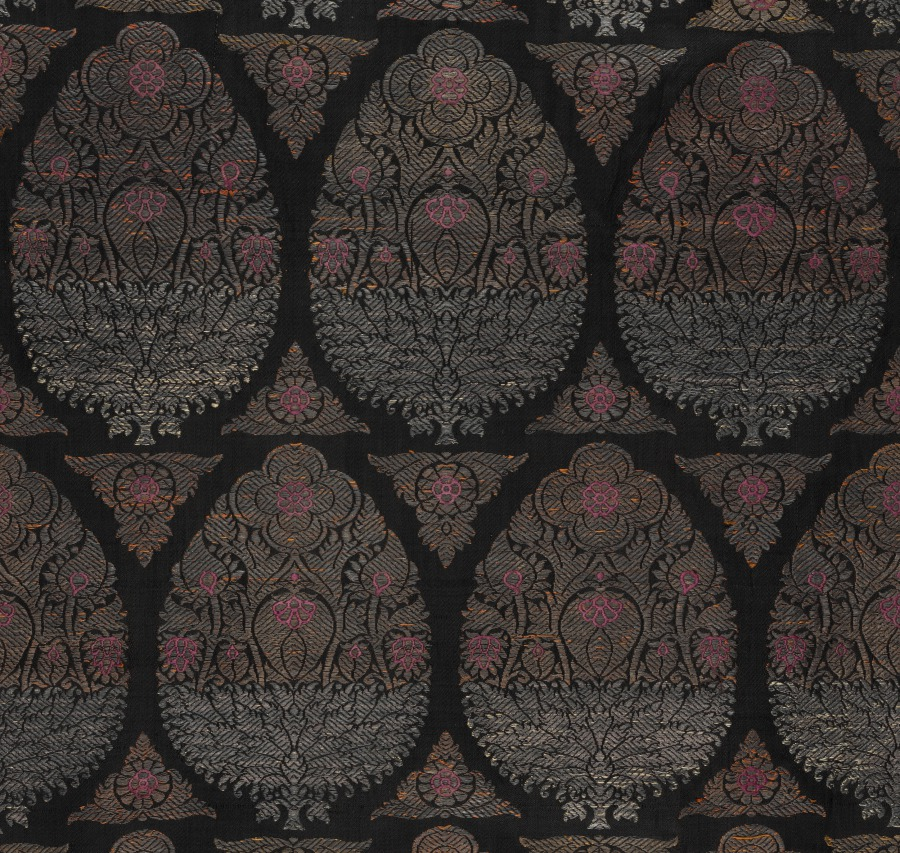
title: Fragment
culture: India, Benares, 19th century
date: 1800s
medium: brocade, "kimkhwab"; silk with gold and silver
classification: Textile